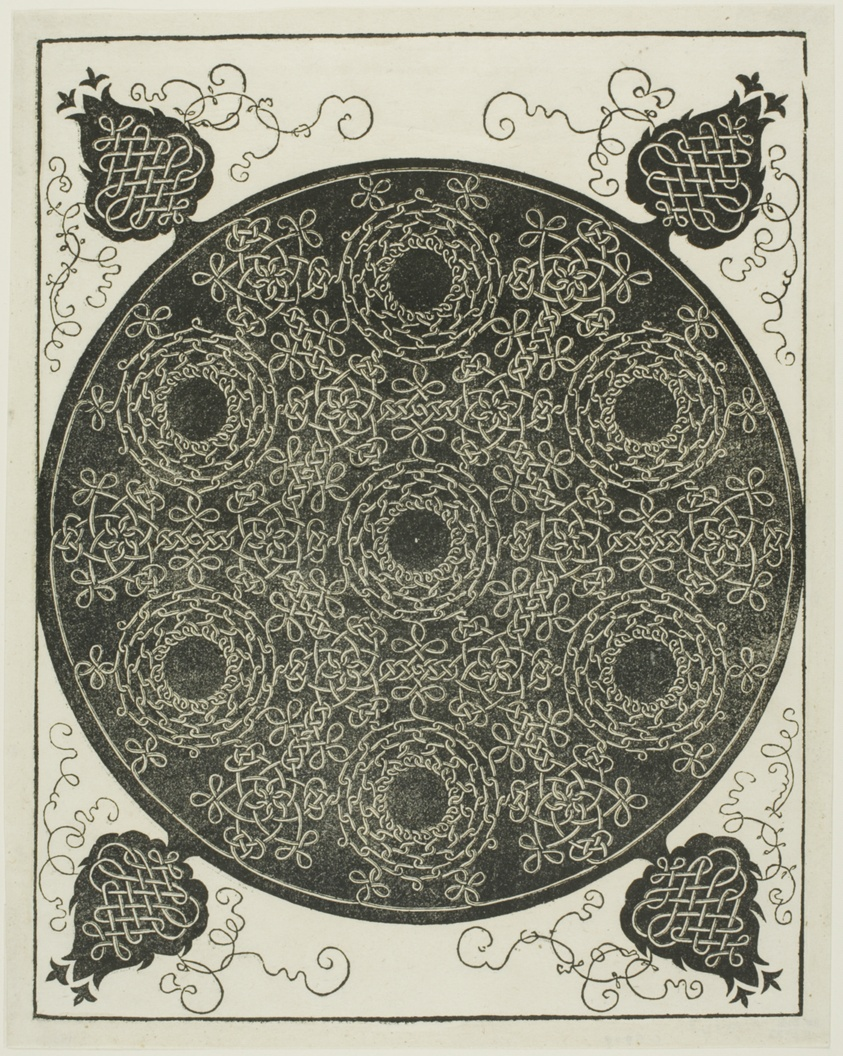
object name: Print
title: The Fourth Knot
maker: Albrecht Dürer (German, 1471-1528)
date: c. 1507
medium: Woodcut in black on ivory laid paper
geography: Germany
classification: woodcut; print; prints and drawing; paper